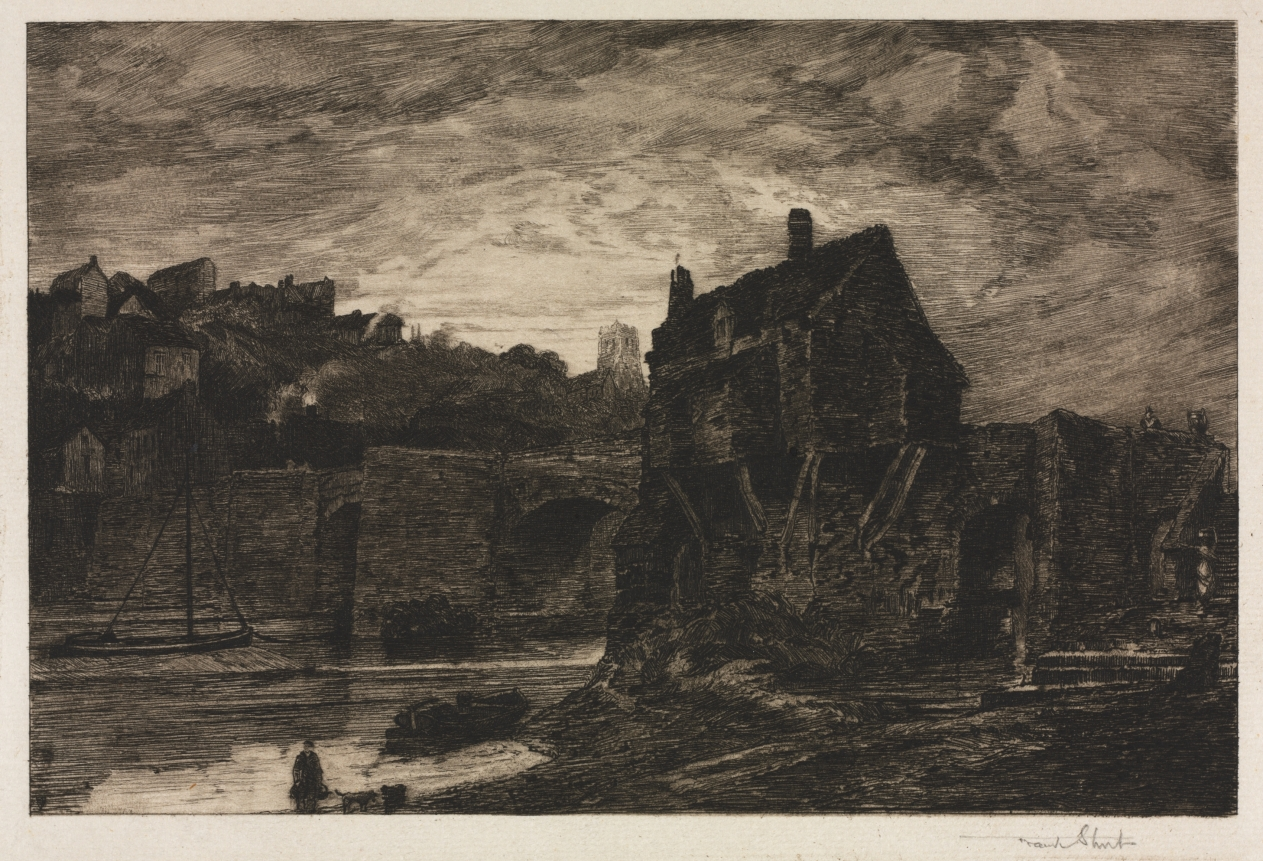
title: Bridgenorth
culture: England, 19th century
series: The Portfolio, Vol. XIX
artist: Frank Short (British, 1857–1945)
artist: after Thomas Girtin (British, 1775–1802)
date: 1885, published 1888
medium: etching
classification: Print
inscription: Lower right, in pencil: "Frank Short" Bottom left, in pencil: "J. A. S. 20 Bridgenorth" Bottom right, in pencil: "After Girtin A290." Verso, top left, in pencil: "88 Bridgenorth 3-3-0."